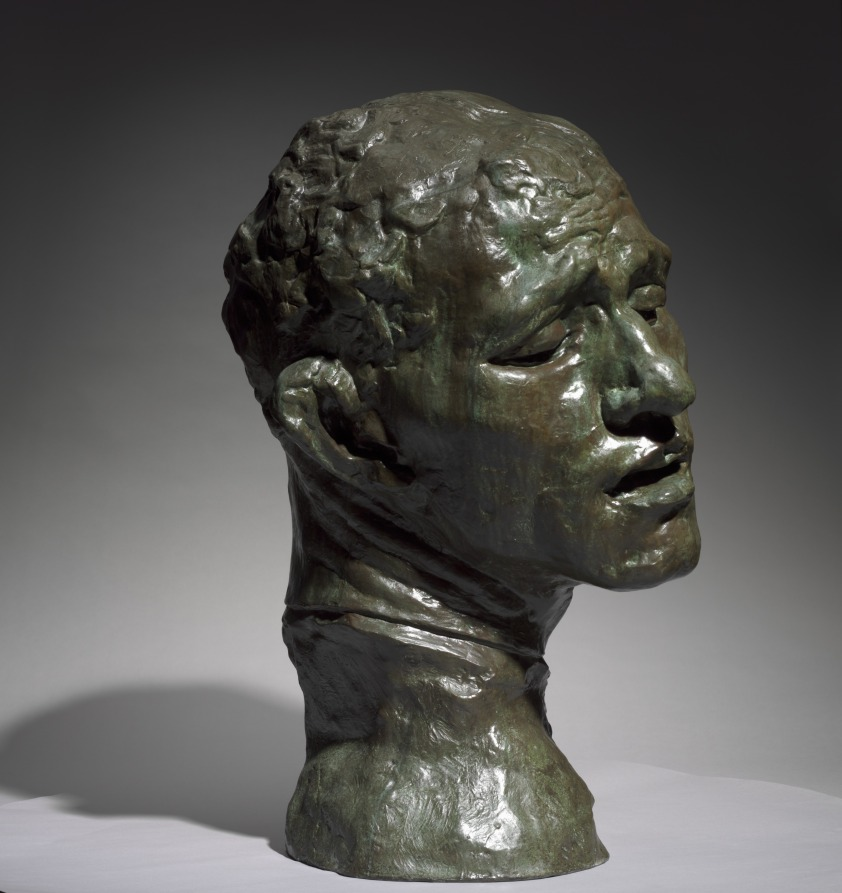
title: Heroic Head of Pierre de Wissant, One of the Burghers of Calais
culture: France, 19th century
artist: Auguste Rodin (French, 1840–1917)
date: 1886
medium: bronze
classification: Sculpture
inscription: inscribed at neck, left: A.Rodin; inscribed lower back: Alexis Rudier/Fondeur-Paris.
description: This sculpture depicts one of the figures in Rodin’s large public monument The Burghers of Calais (1884–89), featuring six French men who volunteered to be taken prisoner by the English in exchange for lifting the siege of Calais during the Hundred Years War (1337–1453). Pierre de Wissant’s anguished expression suggests extreme mental suffering as he contemplates his expected execution. Rodin exhibited a life-size version of the figure as an independent work before completing the monument. He later made multiple versions in various sizes and media.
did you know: This sculpture depicts the head of a figure from Rodin's large public monument The Burghers of Calais (1884-89). The CMA also owns a plaster version of the head.